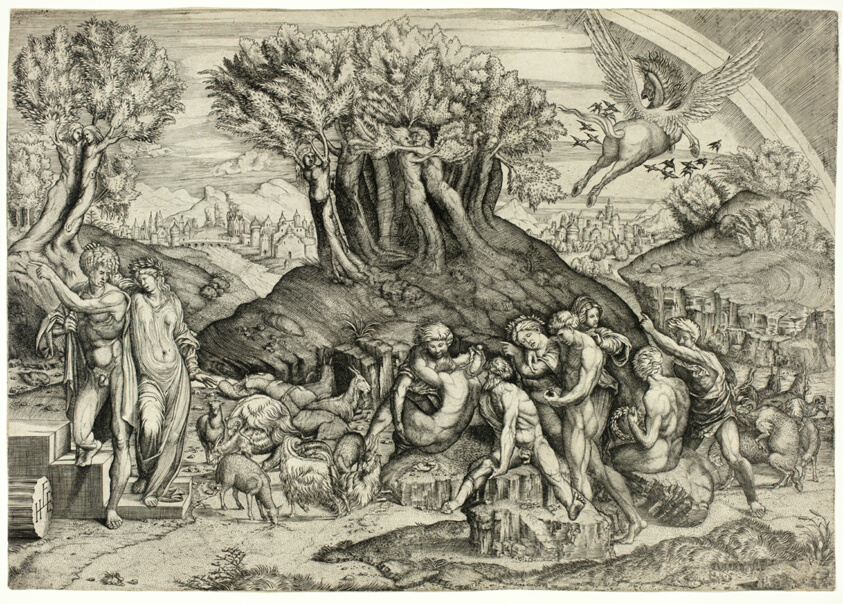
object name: Print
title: Parnassus Profaned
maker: Master HFE; Italian, early 16th century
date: after 1520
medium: Engraving in black on ivory laid paper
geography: Italy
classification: engraving; paper; print; prints and drawing